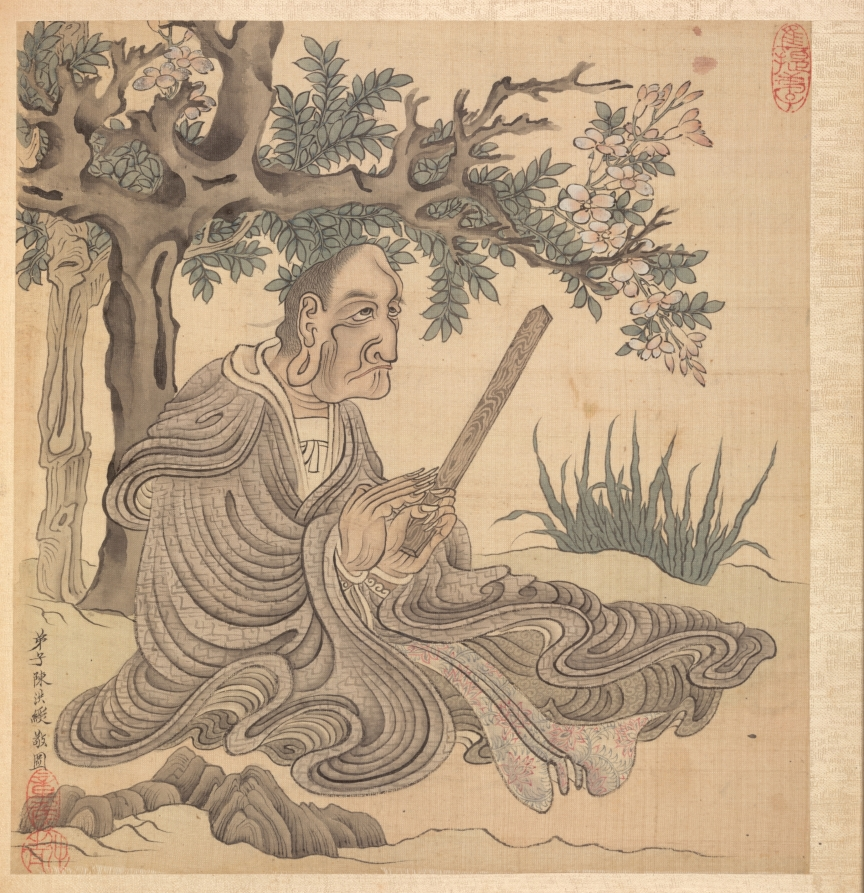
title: Paintings after Ancient Masters: A Lohan [after Guanxiu]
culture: China, Ming dynasty (1368–1644)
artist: Chen Hongshou (Chinese, 1598/99–1652)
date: 1598–1652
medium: album leaf, ink and color on silk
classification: Painting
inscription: Buddhist disciple Chen Hongshou respectfully painted. [2 seals] Chun-t'i ti-tzu; Chang-hou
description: The twenty paintings in this double album by Chen Hongshou include landscapes, figures, and flowers. It also has one leaf featuring a woman, an often-used subject not found in the other albums from the latter part of his career. His late works are wonderful summations of Chen's peculiar and quirky art—archaistic, hyper-refined—but without accompanying shallowness or sentimentality. His figures and landscapes in the late albums are miniaturized, not unlike the small Chinese gardens, or the carefully selected small table rocks or old roots used for contemplation to see the world in miniature. This loss of scale is quite deliberate and reflects the psychological situation of a depressed class like the Ming loyalist officials and scholars, deprived of their integrity and honor, and forced to lead a diminished and restricted existence.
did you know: Chen Hongshou's gnarled and age lohan, a disciple of Buddha, was inspired by paintings made 700 years earlier by Buddhist monk Guanxiu.